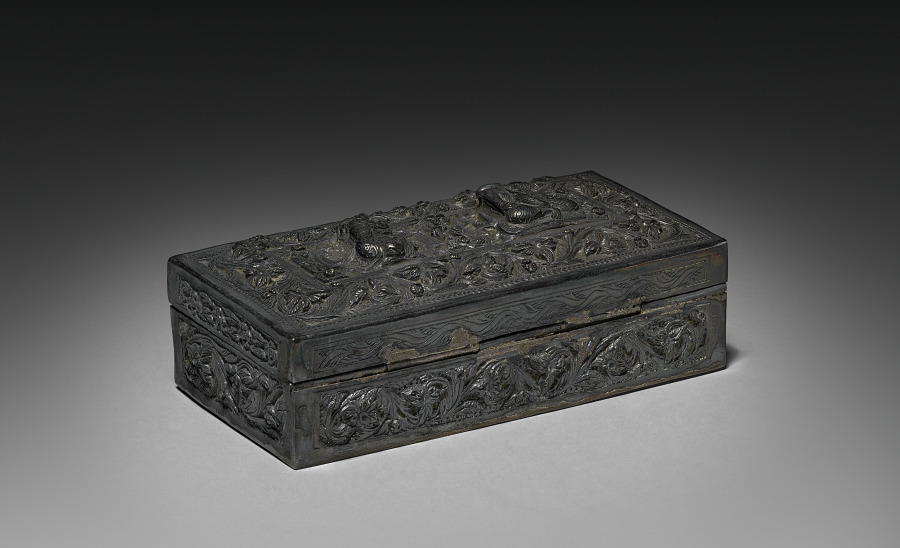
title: Rectangular Box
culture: Siam, 19th century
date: 1800s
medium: silver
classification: Metalwork